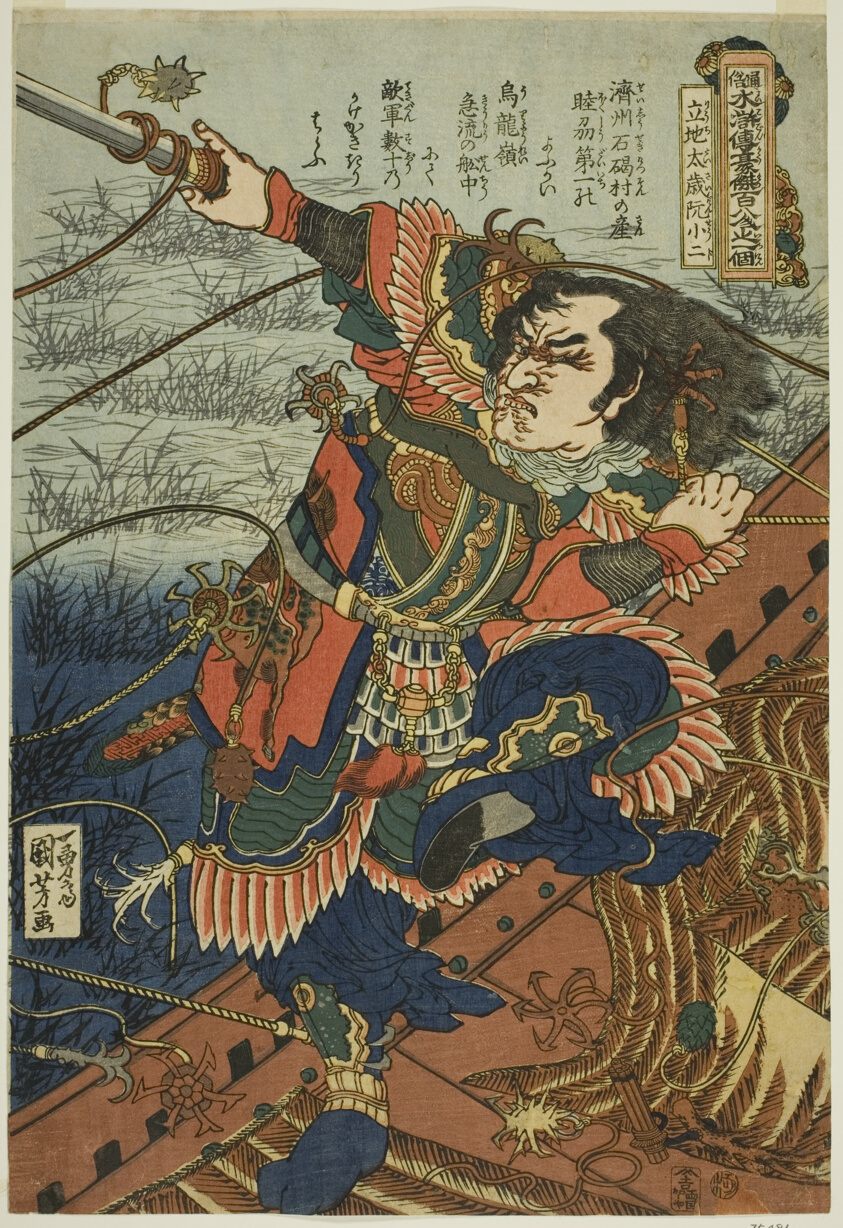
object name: Print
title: Ruan Xiao'er (Ritchitaisai Genshoji), from the series "One Hundred and Eight Heroes of the Popular Water Margin (Tsuzoku Suikoden goketsu hyakuhachinin no hitori)"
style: Japanese (culture or style)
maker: Utagawa Kuniyoshi (Japanese, 1797-1861)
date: c. 1827/30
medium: Color woodblock print; oban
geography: Japan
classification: woodblock print; print; asian art